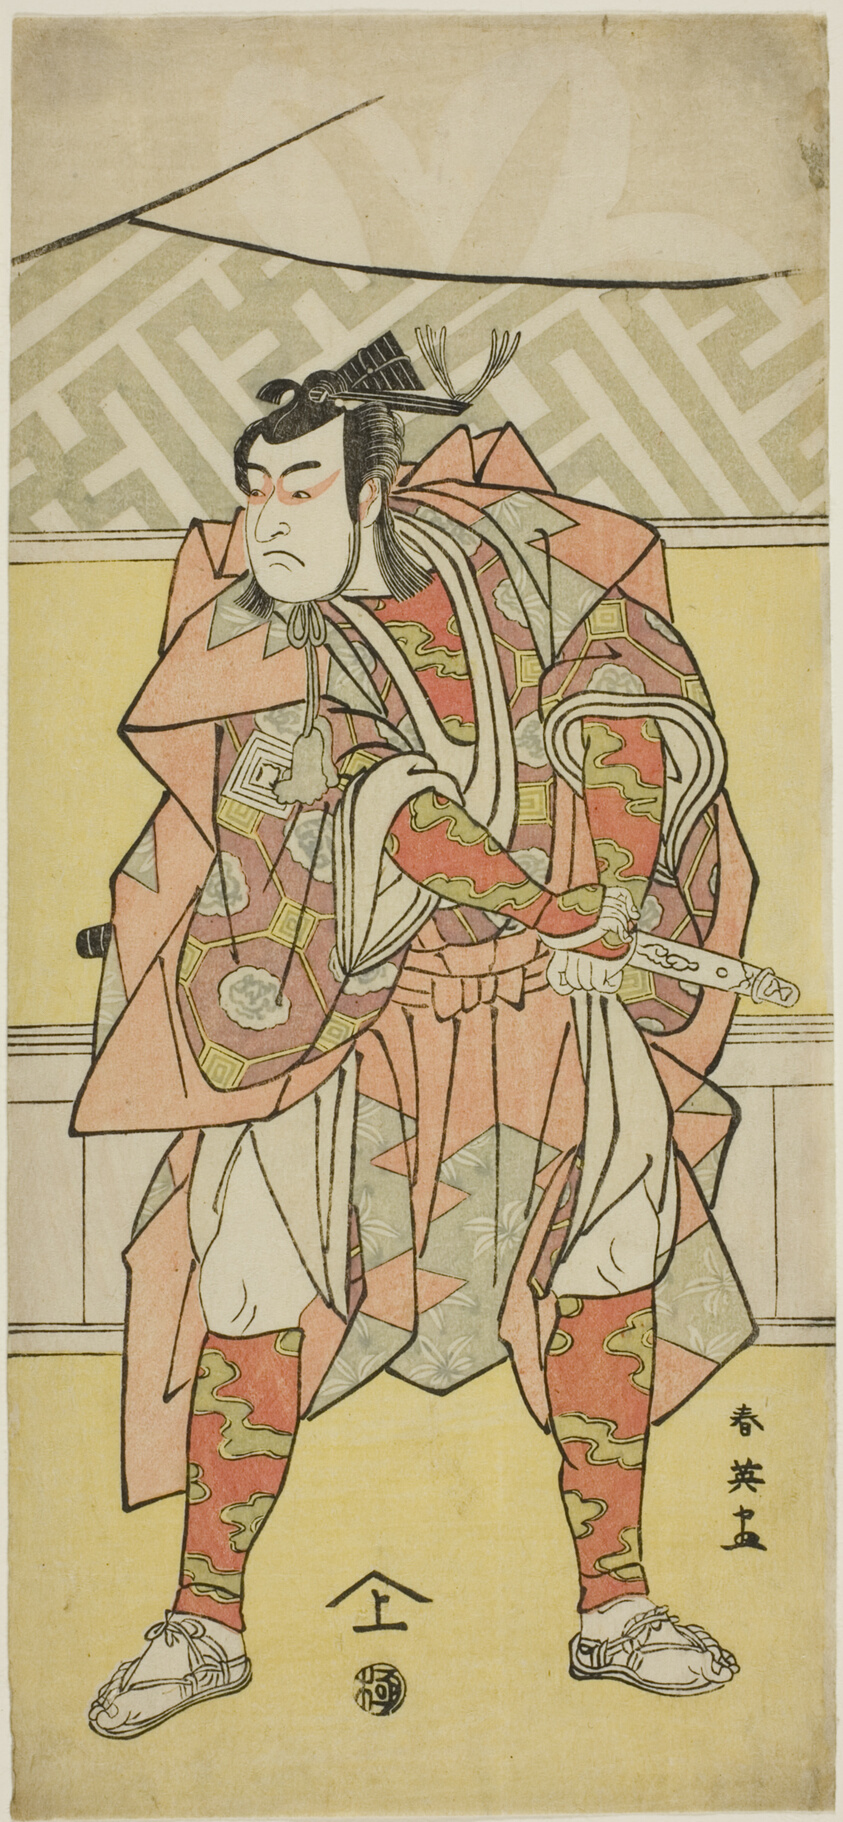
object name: Print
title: Actor Ichikawa Monnosuke II as Mori no Rammaru in “Muromacho Chronicle in Kana Script” (“Kanagaki Muromachi bundan”)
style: Japanese (culture or style)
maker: Katsukawa Shun’ei; Japanese, 1762–1819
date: About 1791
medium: Color woodblock print; hosoban triptych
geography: Japan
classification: woodblock print; print; asian art